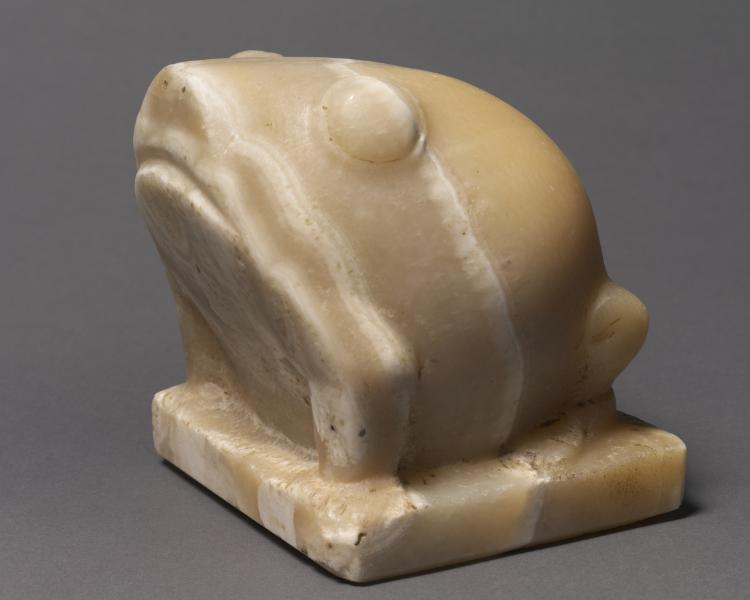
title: Statue of Heqat, the Frog Goddess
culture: Egypt, Predynastic (5000–2950 BCE), Naqada III (3200–3000 BCE)–Egypt, Early Dynastic (2950–2647 BCE), Dynasty 1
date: c. 2950 BCE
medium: travertine (Egyptian alabaster)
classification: Sculpture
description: During the Predynastic period statues of animals are much more common than those of humans. This statue of a frog stands at the beginning of a great tradition of animal sculpture in Egyptian art. The sculptor has shown great sensitivity to the natural banding of the stone, using it to enhance the roundness of the animal's form. Small frogs, mostly of faience, are among the most common votive offerings deposited at early temple sites. The frog's exact religious significance in the Predynastic period is unknown, but in later times it was most often identified with Heqat, the goddess who assisted at childbirth.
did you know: This probably represents a puffed-up Bufo viridis, one of two types of "frogs" (it is actually a toad) represented in Egyptian art.